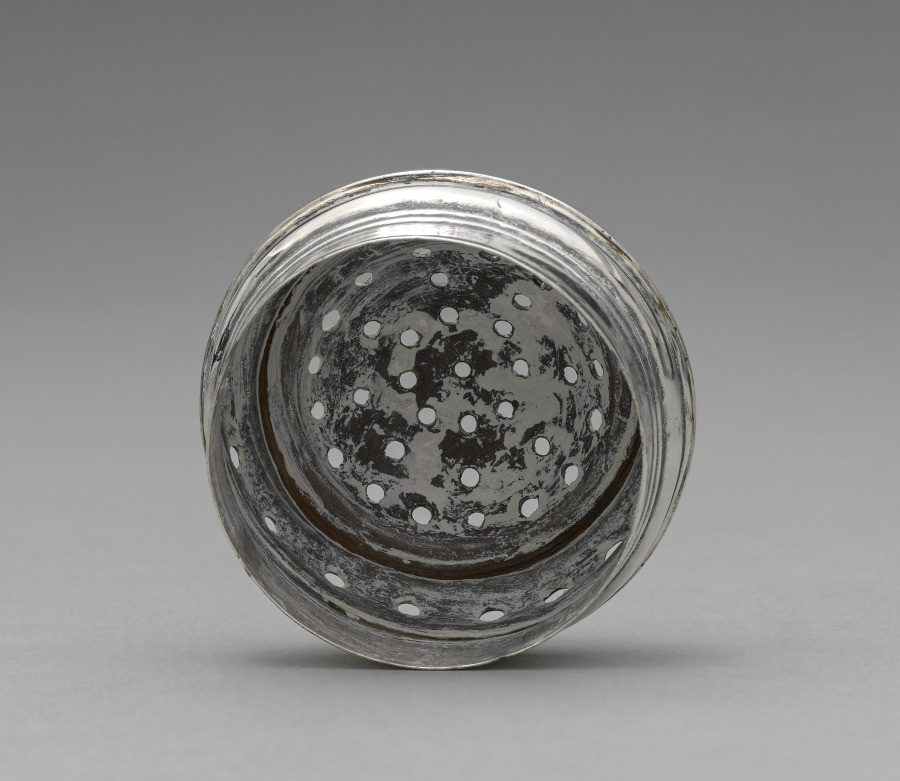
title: Caster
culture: America, Massachusetts, Boston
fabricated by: John Edwards (British)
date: c. 1715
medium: silver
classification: Silver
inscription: engraved "C" over "EE" in shaded block letters on bottom, and "FLB" (later) in bright-cut script on front, opposite handle.